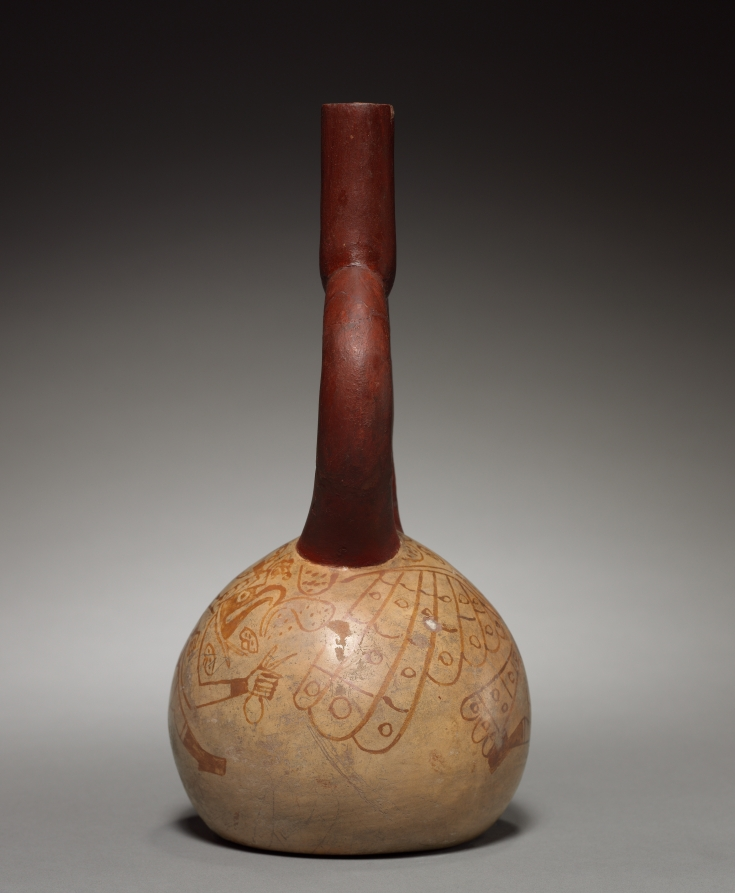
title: Bottle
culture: Peru, Chimú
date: c. 200–400 CE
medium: pottery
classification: Ceramic